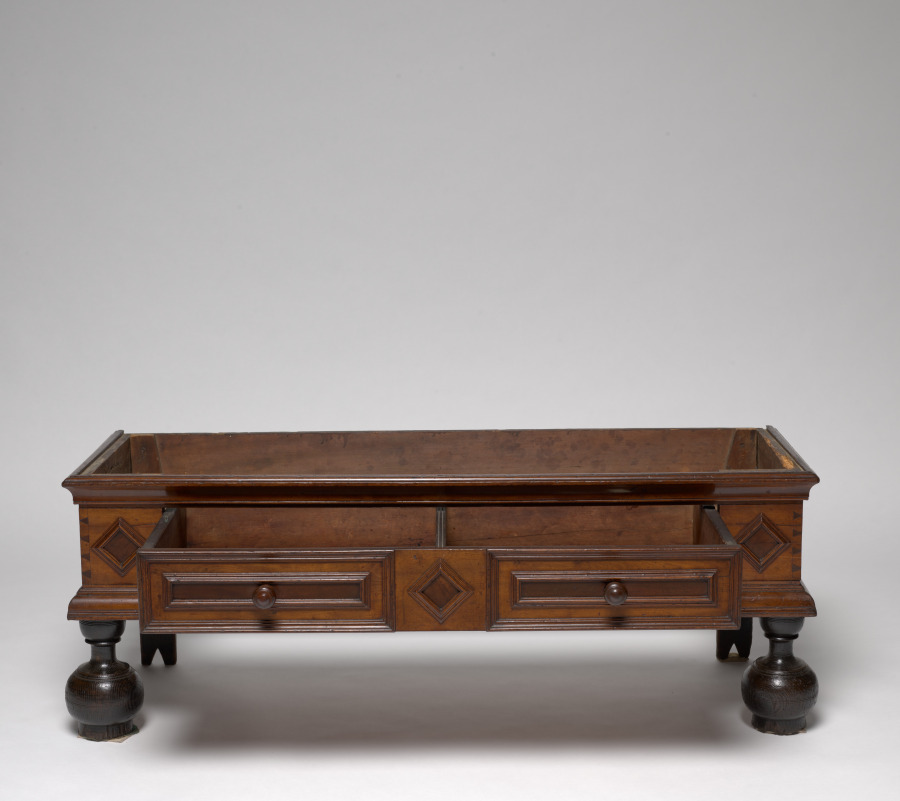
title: Kast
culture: American, King County, NY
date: c. 1710–1740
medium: Various woods, wrought iron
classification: Furniture and woodwork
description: The earliest furniture made in America often shared similarities with works made in the country from where the settlers originated. With its bun feet, paneled surface, and broad projecting cornice, this wardrobe (kast) resembles earlier Dutch examples that come from Amsterdam and its surrounding areas. Therefore, this wardrobe was likely made by the Dutch settlers who colonized New York and New Jersey.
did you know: This Dutch American wardrobe was likely made in a community along the Hudson River in New York by a cabinetmaker who had originally come from the region in or around Amsterdam in Holland.